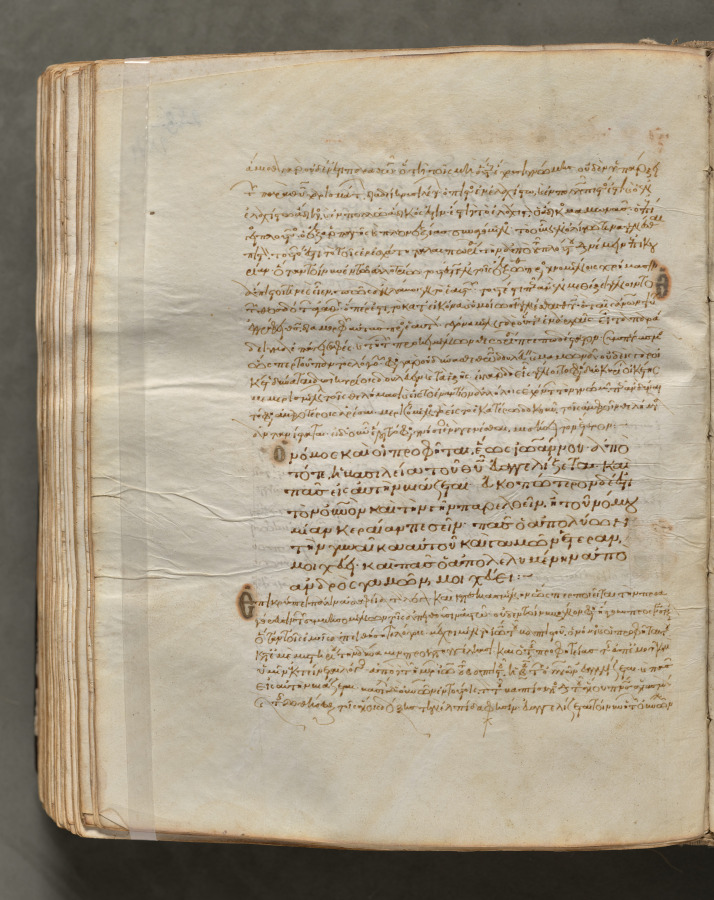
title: Text, folio 284 (verso), from a Gospel Book with Commentaries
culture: Byzantium, Constantinople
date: c. 1000–1100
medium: ink, tempera, and gold on vellum; leather binding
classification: Bound Volume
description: Each of the four gospels in this book opens on a page with brilliantly illuminated borders depicting the author of the text as well as birds—principally peacocks, symbols of the immortality of the soul—and fountains, representing the fountain of life and the salvation of the soul. This volume consists of 428 leaves with texts in Greek. Its level of sophistication suggests that it was probably written and decorated in a monastery in Constantinople.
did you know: Gospel books were carried in procession through Byzantine churches.